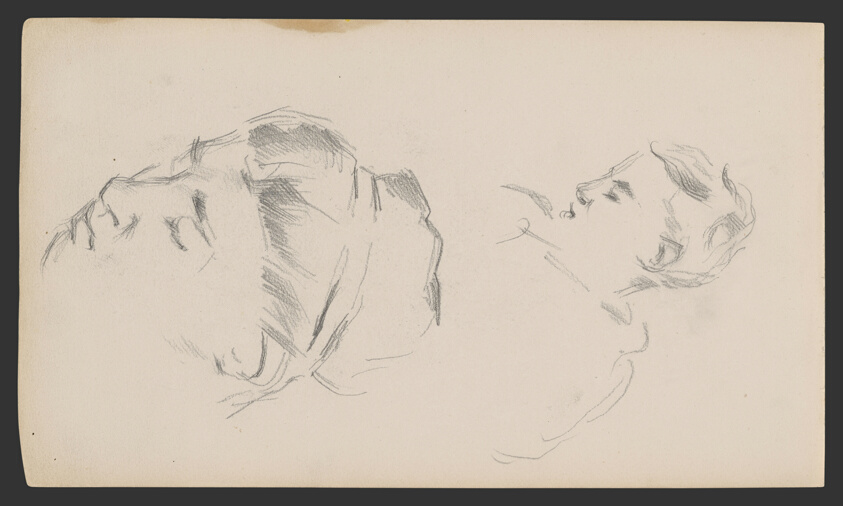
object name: Drawing and Watercolor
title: Sketchbook No. 2 (L'Estaque)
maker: Paul Cézanne; French, 1839-1906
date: 1875–86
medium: Graphite and pen and ink drawings on paper, bound into a book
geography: France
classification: sketchbook; graphite; prints and drawing; paper